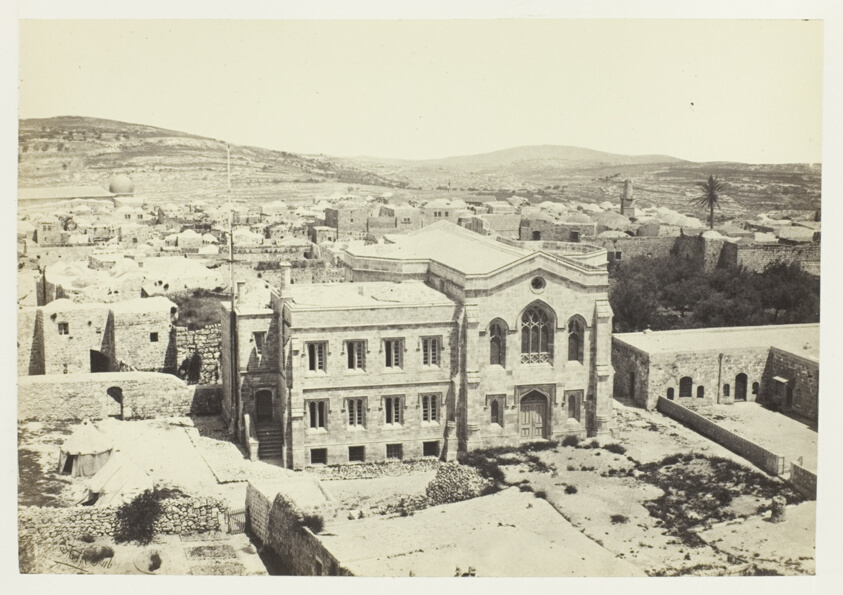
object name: Photograph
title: The New English Church from the Tower of Hippicus, Jerusalem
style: 19th century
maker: Francis Frith (English, 1822–1898)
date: 1857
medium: Albumen print, pl. 6 from the album "Egypt and Palestine, Volume I" (1858)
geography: England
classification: photograph; albumen silver print; photography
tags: Collected by Hugh Edwards, Egypt and Palestine